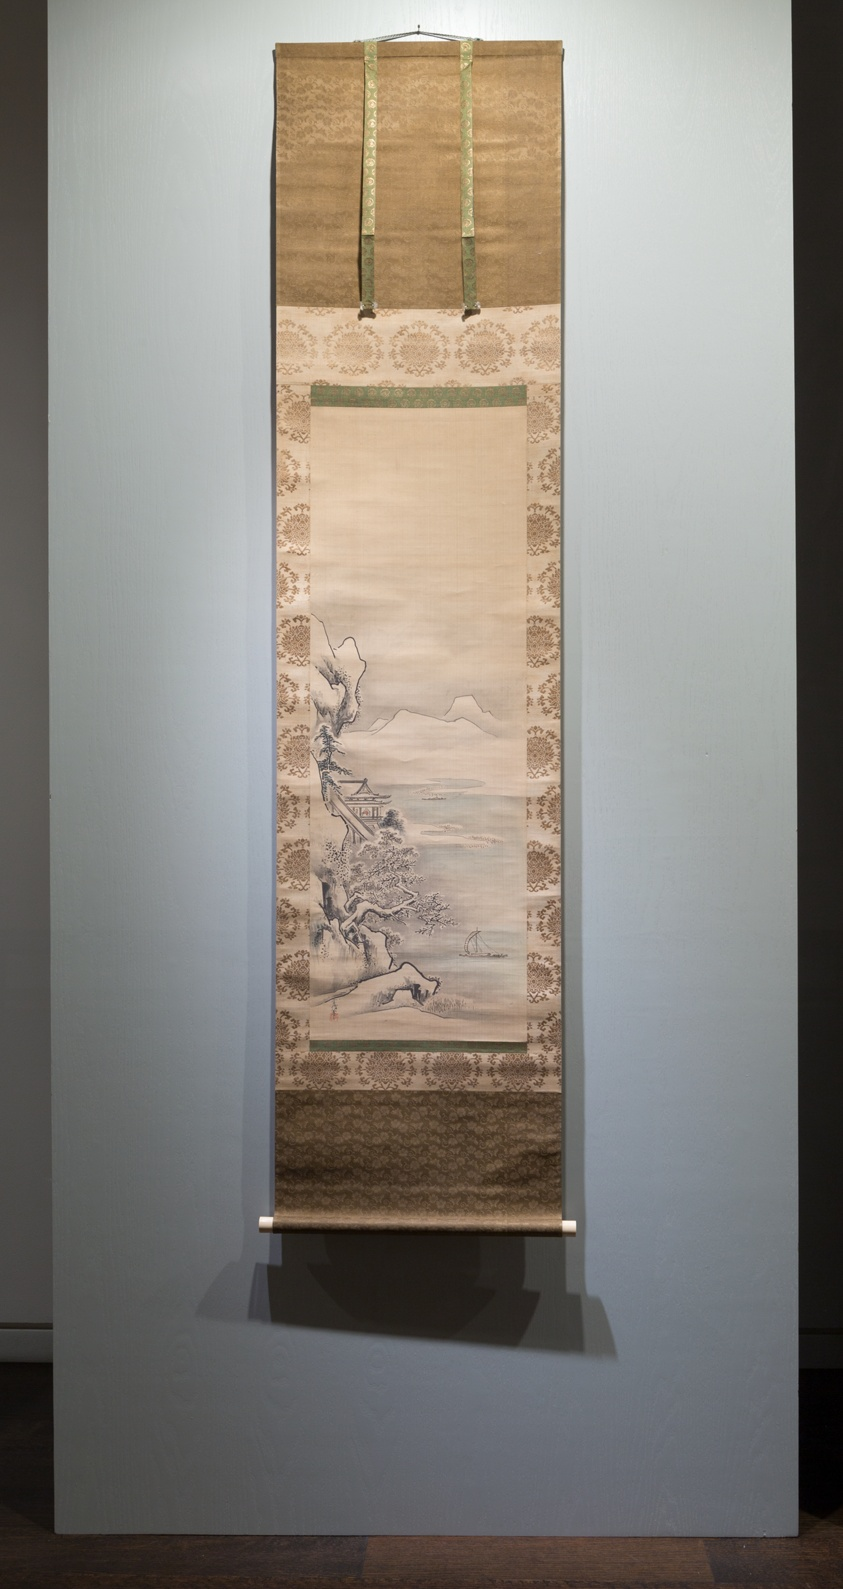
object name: Painting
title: Fei Jiang-fang with a Crane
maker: Kano Tsunenobu; Japanese, 1636-1713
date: Late 17th–early 18th century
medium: Triptych of hanging scrolls; ink and light colors on silk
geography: Japan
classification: hanging scroll; painting; asian art